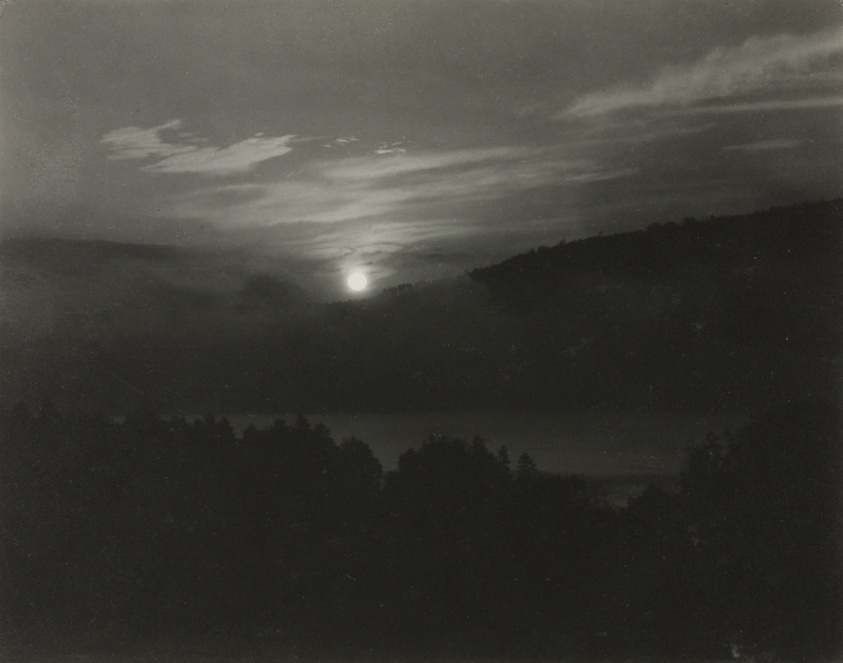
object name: Photograph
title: Equivalent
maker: Alfred Stieglitz (American, 1864–1946)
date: 1925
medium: Gelatin silver print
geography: United States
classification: gelatin silver (developing-out-paper) pr; photographic process; photography; photograph